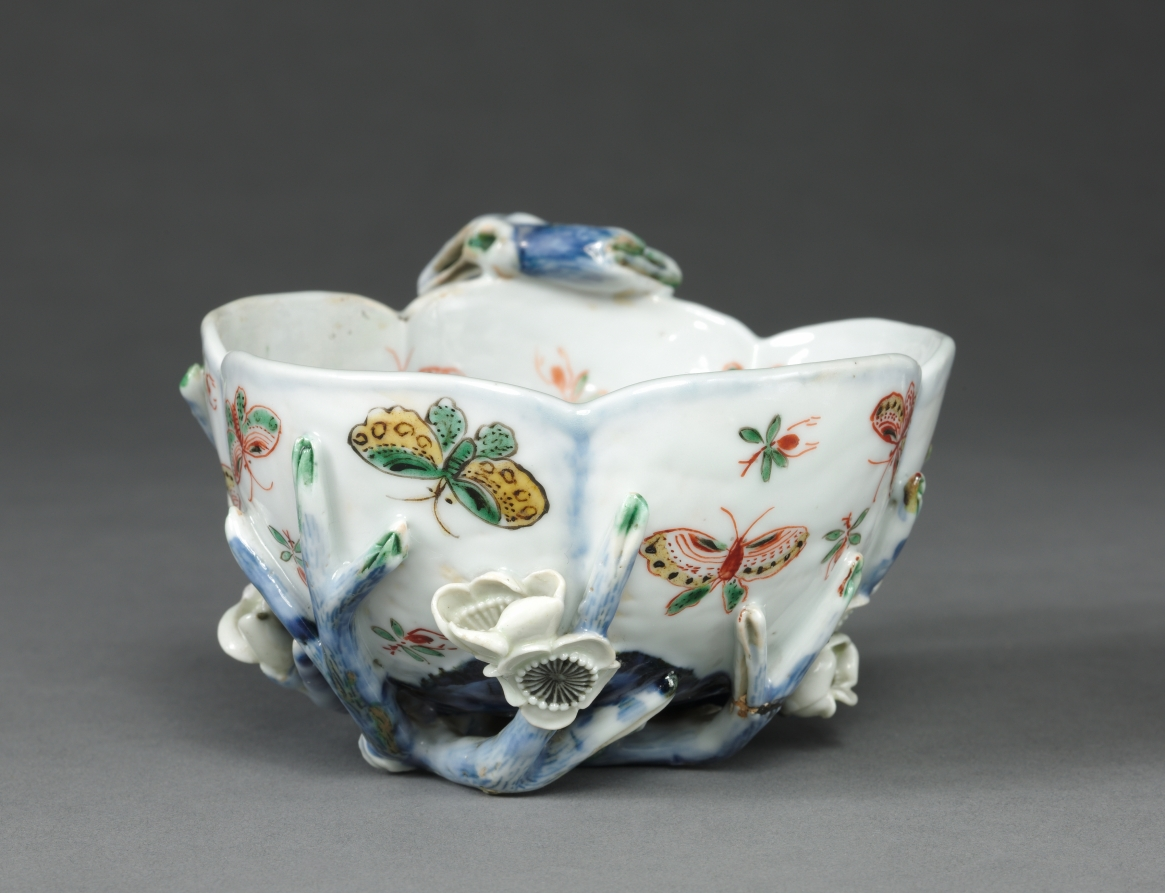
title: Plum Blossom Cup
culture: China, Jiangxi province, Jingdezhen kilns, "Transitional period", Ming dynasty (1368-1644), Tianqi reign (1621-1627)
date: 1621–27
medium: porcelain with underglaze blue and wucai (five color) overglaze enamel decoration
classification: Ceramic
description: This porcelain cup is considered to have been made in the "Transitional period," a term used to define the period between about 1620 and 1683 when official kilns in Jingdezhen were no longer under imperial supervision due to the transition from the Ming to the Qing dynasties.